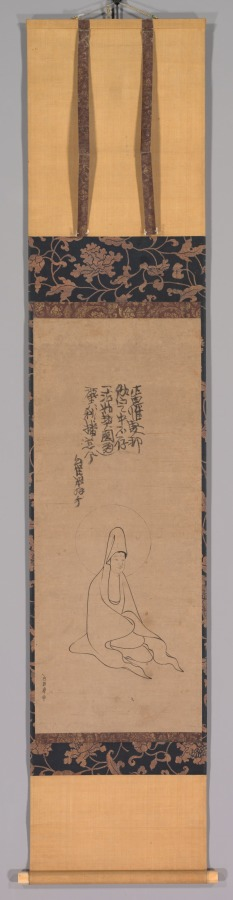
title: White-Robed Guanyin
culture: China, Yuan dynasty (1271-1368)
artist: Jueji Yongzhong (Chinese, active around 1300)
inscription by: Zhongfeng Mingben (Chinese, 1263–1323)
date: late 1200s–early 1300s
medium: hanging scroll; ink on paper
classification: Painting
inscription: Artist's signature: Huanzhu Yongzhong. Inscription by Zhongfeng Mingben: The right thinking [Samkalpa] is embodied within His deep meditation on the Buddha [naga-samadhi]. Retaining not even one single object of thought, A perfect harmony was wonderfully achieved. In the endless time and space, His all-embracing compassion prevails. [signed] Mingben of Huanzhu paying his respects.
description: Guanyin, the bodhisattva of infinite compassion (Avalokiteshvara, in Sanskrit), reveals himself in many forms. According to Buddhist belief, one such manifestation is the white-robed Guanyin sitting on a rock on the island of Putuo (Potalaka, in Sanskrit), located along the coast not far from Ningbo, in Zhejiang Province, China. Here, the figure was swiftly drawn in only a few ink lines. The inscription above is by Zhongfeng Mingben, perhaps the most widely respected and influential Chan (Zen in Japanese) master in the Yuan dynasty. The artist’s signature is a single line below on the left: Huanzhu Yongzhong.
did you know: The CMA collection includes a drawing by a Japanese priest, CMA 1978.47.2, inspired by this composition.